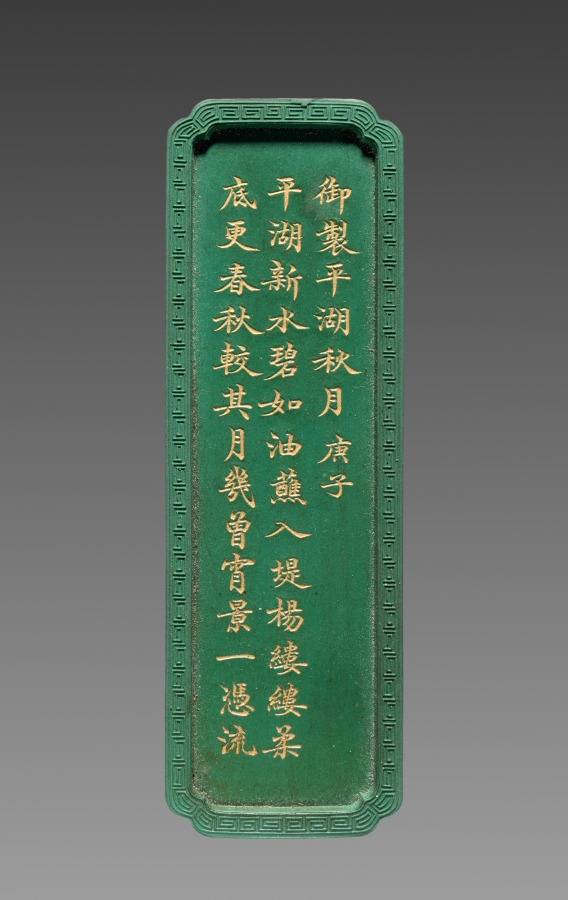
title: Ink Stick from an Imperially Commissioned Set of Ink Stick with Images and Poems of Famous West Lake Sites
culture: China, Qing dynasty (1644–1911), Qianlong reign (1736–95)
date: 1780–94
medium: Molded ink in green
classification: Miscellaneous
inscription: 乾隆年製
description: This is one of ten ink cakes of different shapes and colors stored in an exquisite lacquer box. Each is inscribed in gold with a poem by the Qianlong emperor, praising the ten famous sights of the Westlake in Hangzhou, near Shanghai. The Westlake is famous for its natural beauty; it was a favorite imperial destination and remains a tourist attraction today. Ink cakes (also called ink sticks) are dissolved with the addition of water and ground on the surface of a flat stone into liquid ink for painting and calligraphy. The precious ink cakes here, however, have never been used.